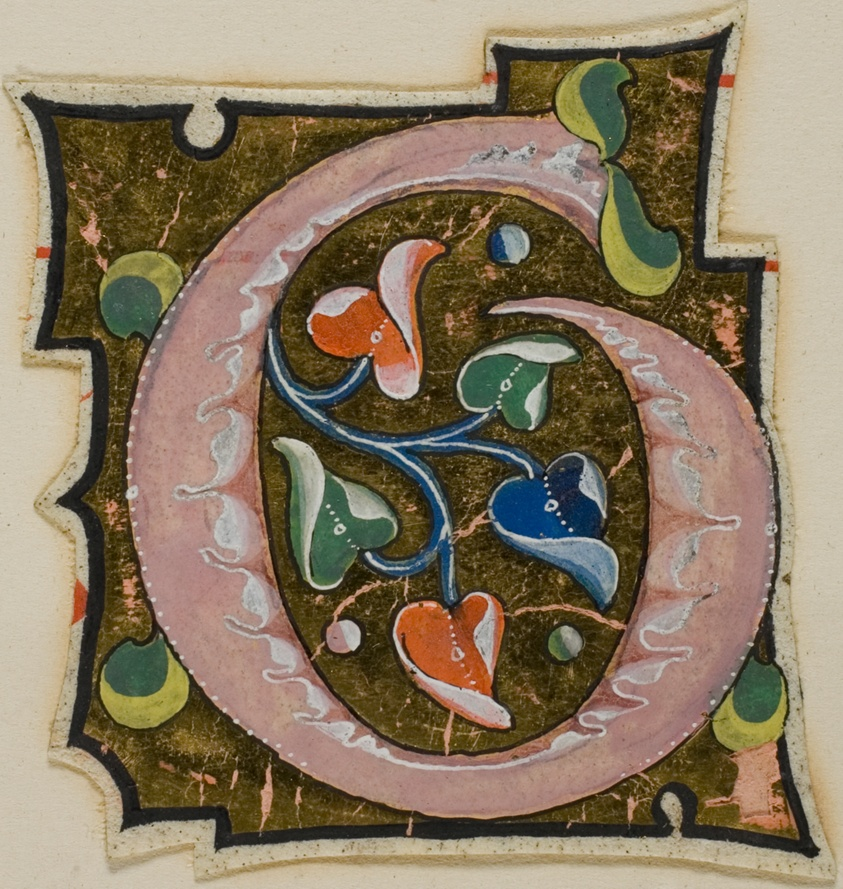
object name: Drawing and Watercolor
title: Decorated Initial "G" in Pink with Curling Leaves from a Manuscript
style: medieval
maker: European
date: 14th century or modern, c. 1920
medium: Manuscript cutting in tempera and gold leaf on vellum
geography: Europe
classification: tempera; manuscript; drawings (visual works); prints and drawing